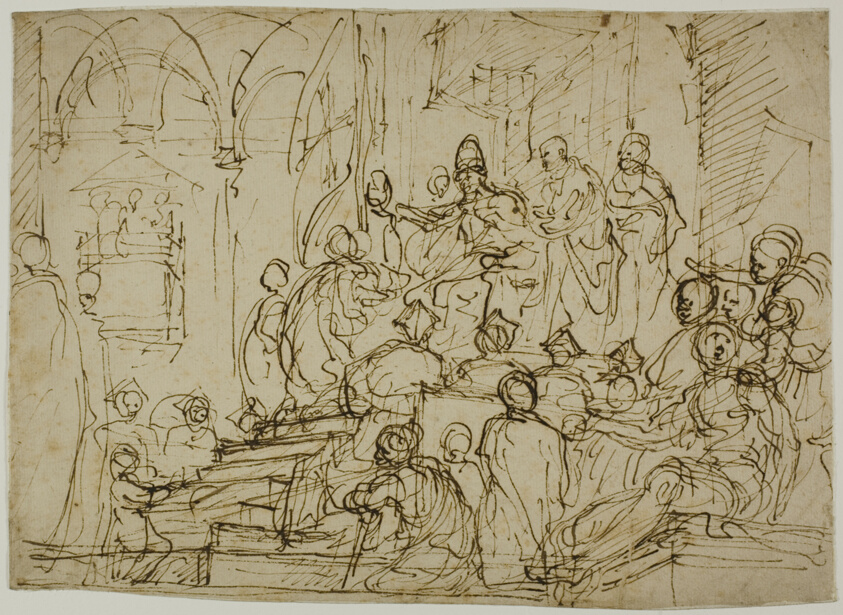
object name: Drawing and Watercolor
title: Enthroned King with Attendants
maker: Domenico Cresti, called Passignano; Italian, 1559-1638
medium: Pen and brown ink on cream laid paper laid down in album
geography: Italy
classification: pen and ink drawings; drawings (visual works); prints and drawing